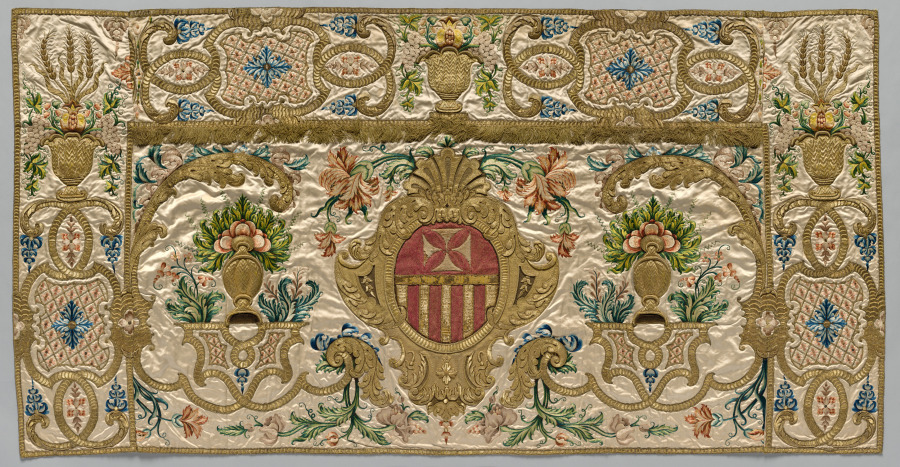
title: Embroidered Front of an Altar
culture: Italy or Spain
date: 1600s–1700s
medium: Satin and silk: embroidery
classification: Embroidery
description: This spectacular cloth with raised three-dimensional embroidery embellished the front of an altar. Lavishly applied gilt-metal thread creates architectural embellishments enhanced by grand vases displaying sheaves of wheat in the upper corners and bunches of grapes in the center of the fringed over-frontal, referring to the bread and wine of the Mass. The central coat of arms represents the Order of the Blessed Virgin Mary of Mercy, a Roman Catholic mendicant order established in 1218 by Saint Peter Nolasco in the city of Barcelona, Spain, then in the principality of Catalonia (crown of Aragon).